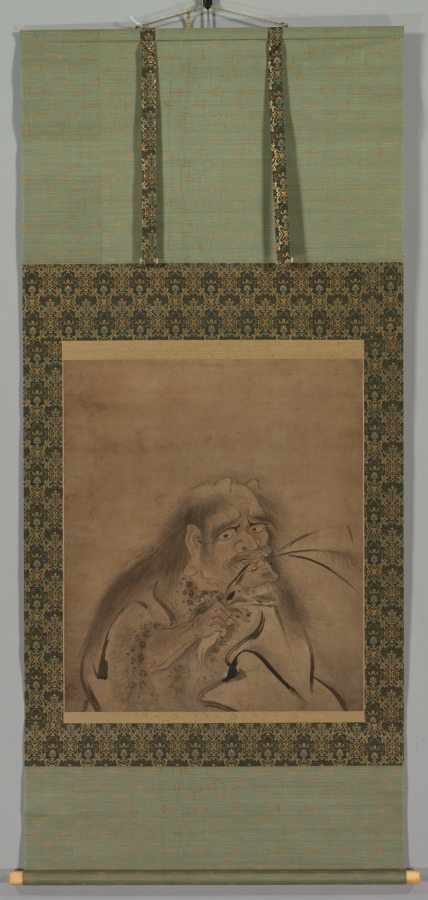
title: Shennong (Shinnō)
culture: Japan, Muromachi period (1392–1573)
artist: Shōryō (Japanese)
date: late 1400s–early 1500s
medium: hanging scroll; ink on paper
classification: Painting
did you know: Shennong legendarily taught people how to farm and also how to use plants as medicine.